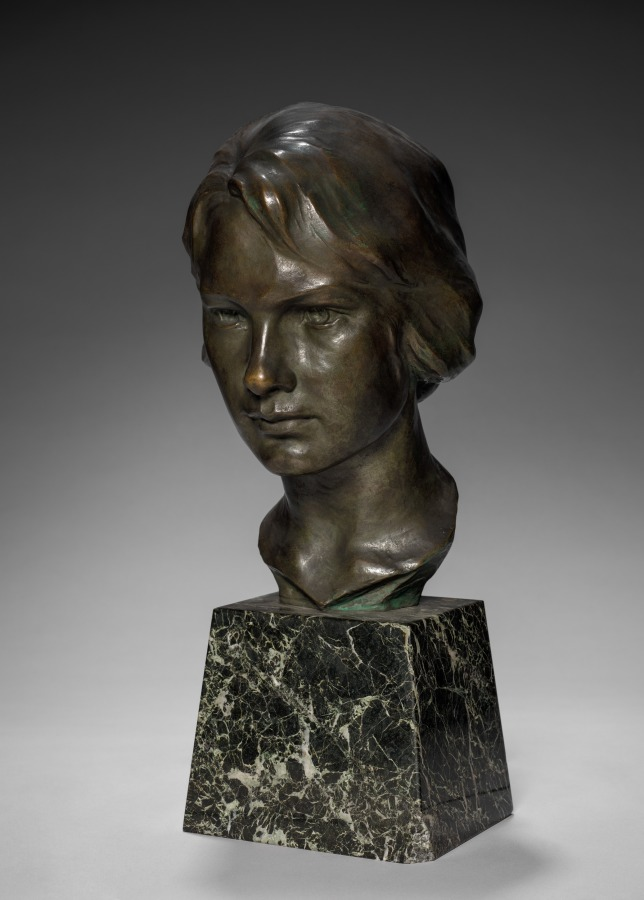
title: Head of a Girl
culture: America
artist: Nancy Coonsman (American, 1888–1920)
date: c. 1920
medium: bronze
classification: Sculpture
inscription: signed back of neck: Nancy Coonsman © R.C. & N.M. Vose/Roman Bronze Works New York.